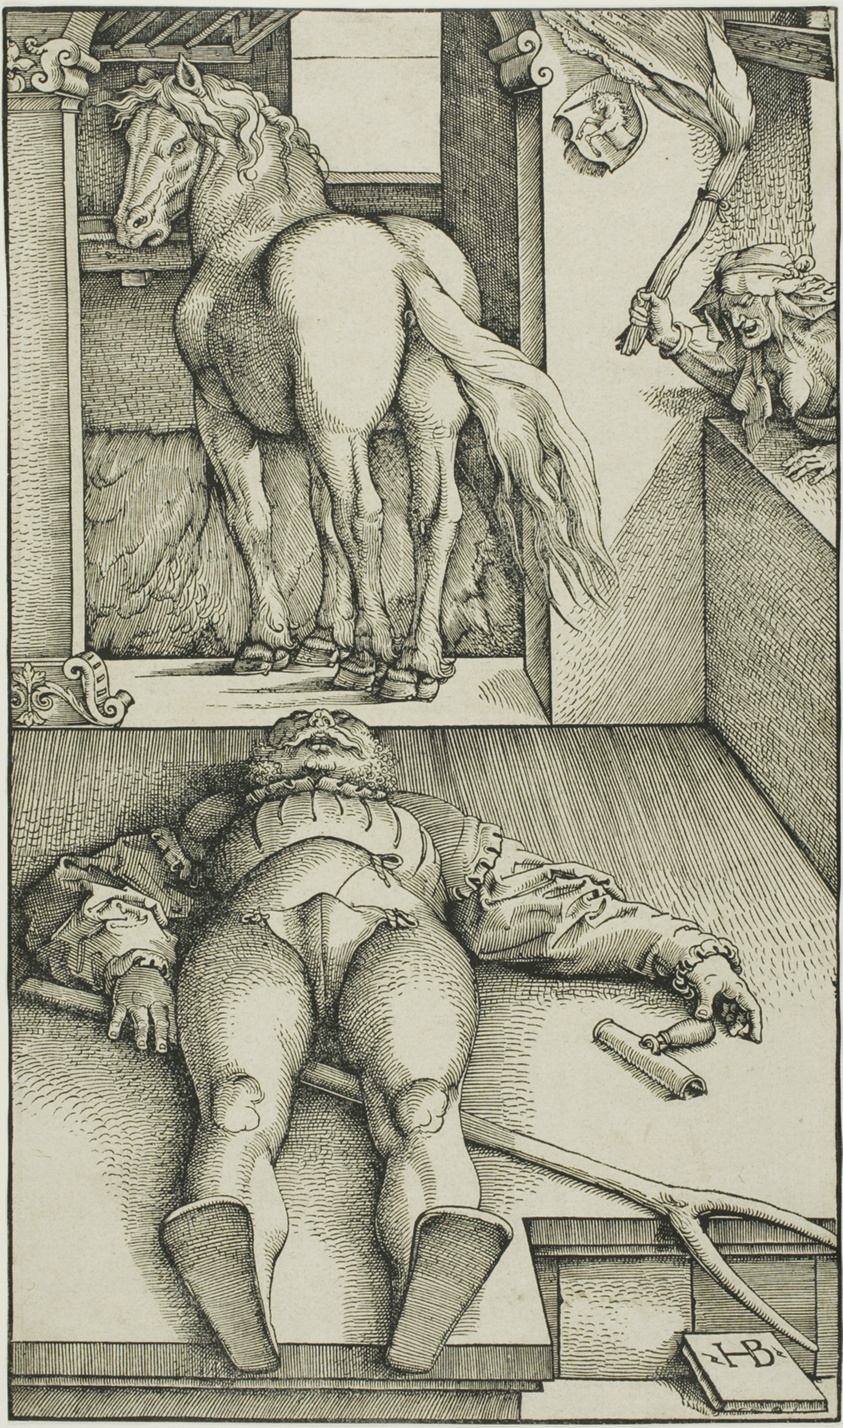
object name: Print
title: The Bewitched Groom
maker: Hans Baldung Grien (German, 1484/85-1545)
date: c. 1544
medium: Woodcut in black on ivory laid paper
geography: Germany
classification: woodcut; print; prints and drawing